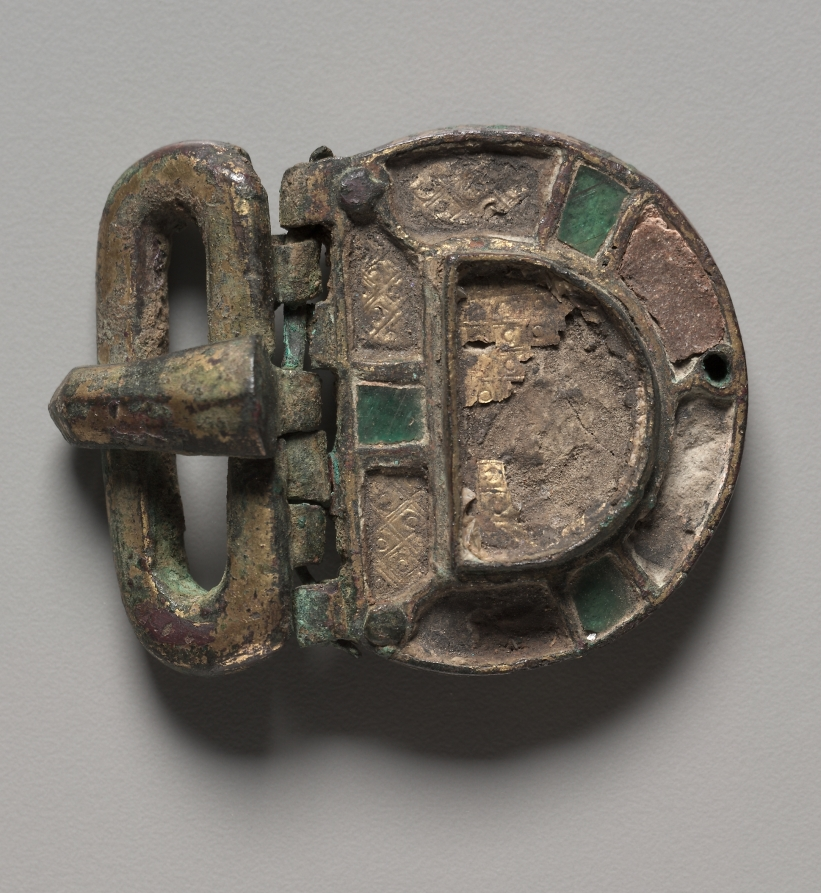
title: Buckle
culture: Ostrogothic?, Migration period, 6th century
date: 500s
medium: bronze, gold foil, traces of gilding and glass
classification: Jewelry